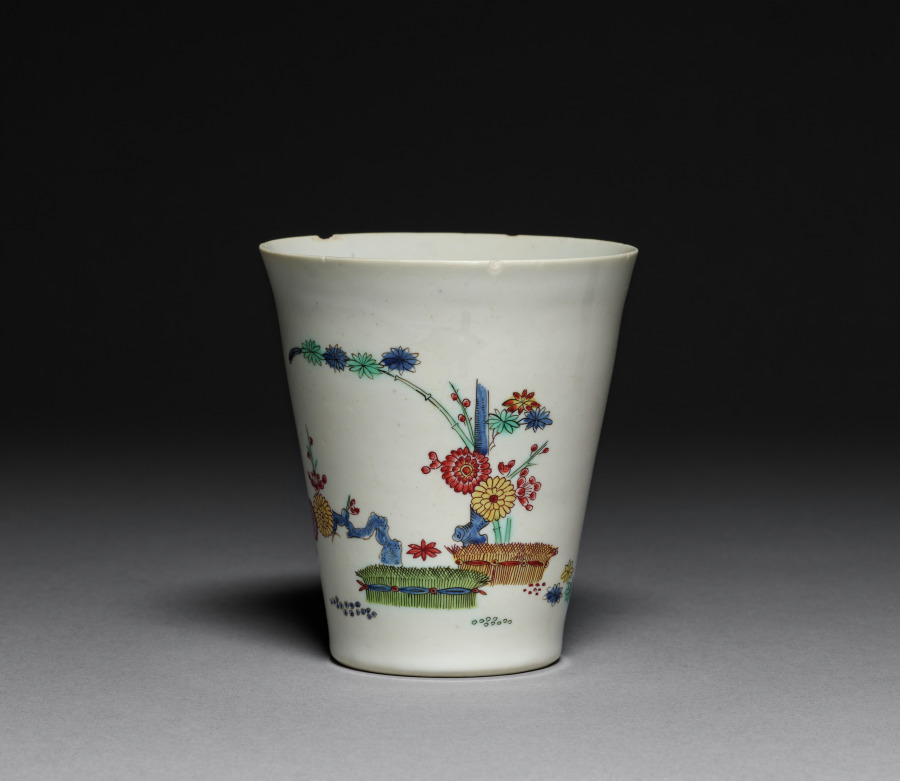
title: Beaker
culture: France, Mennecy, 18th century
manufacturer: Mennecy- Villeroy Factory (French)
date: 1725–1750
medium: soft-paste porcelain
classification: Ceramic